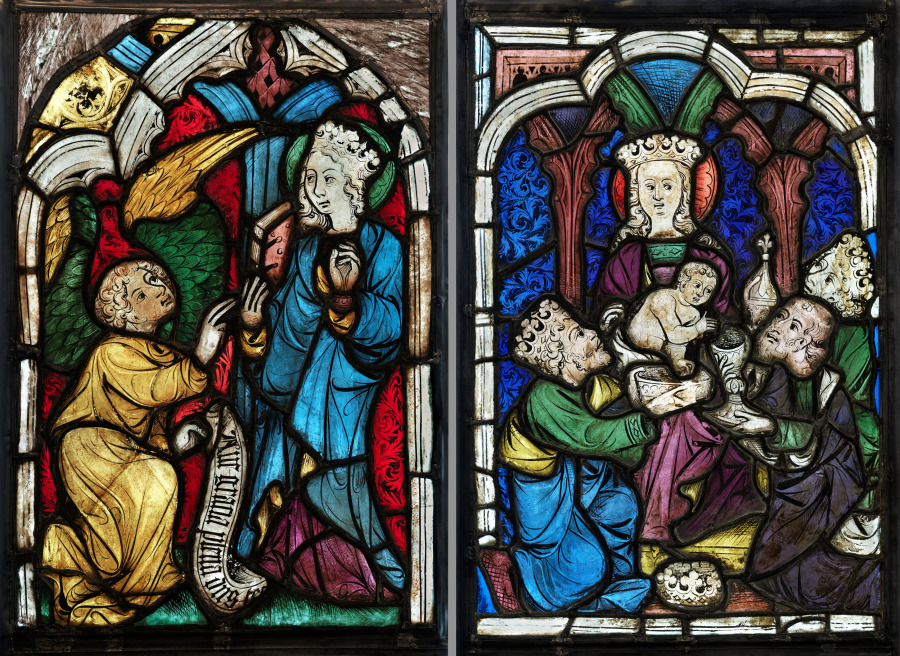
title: Two Windows Depicting the Annunciation and Adoration of the Magi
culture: Austria, Styria, 15th century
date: c. 1410–20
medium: glass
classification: Glass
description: The panels come from the tracery window of a Gothic church in Styria showing the life of the Virgin Mary. They are among the main examples of Austrian stained glass from the early 1400s, showing the main influences of the Bohemian Beautiful Style, which is characterized by elegant figures, a vibrant color palette, and an abundance of ornamental drapery.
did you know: Mary looks distressed and her hesitation is depicted in the face of the Angel’s message.